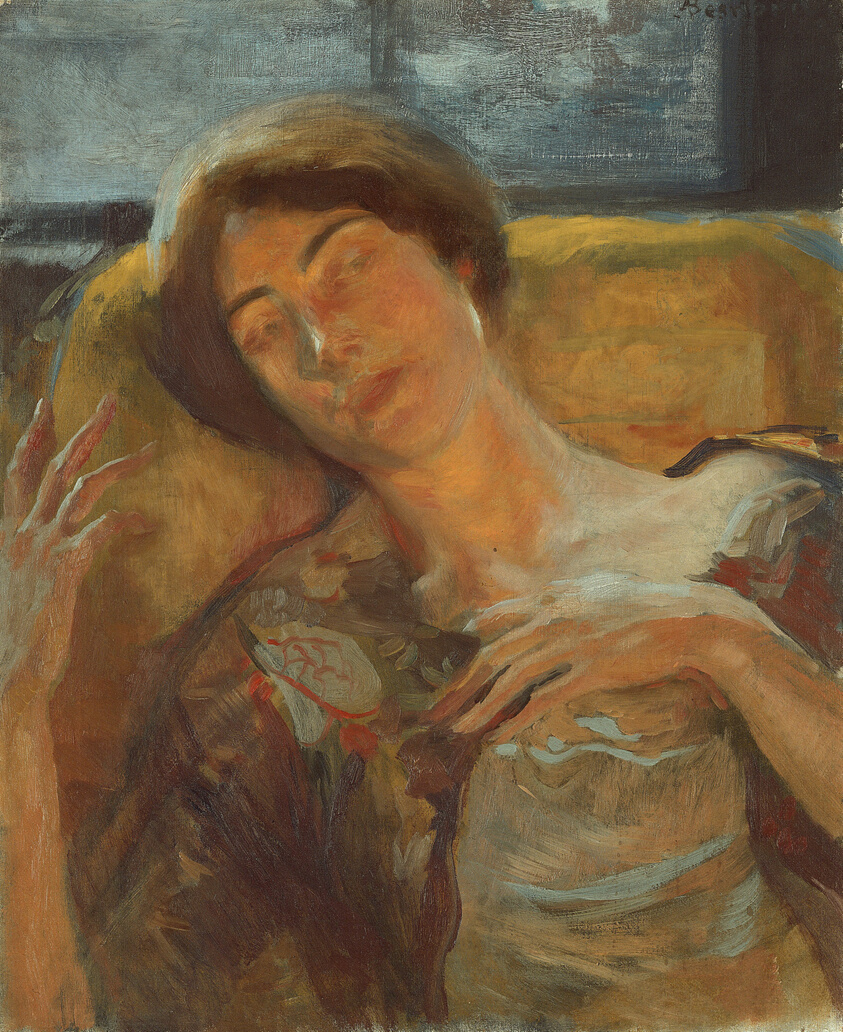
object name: Painting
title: Woman's Head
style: 19th century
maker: Albert Besnard (French, 1849–1934)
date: c. 1890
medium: Oil on cardboard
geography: France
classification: painting; french; oil on cardboard; paint; european painting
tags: woman, chair, interior, portrait, portraits: female subject, window